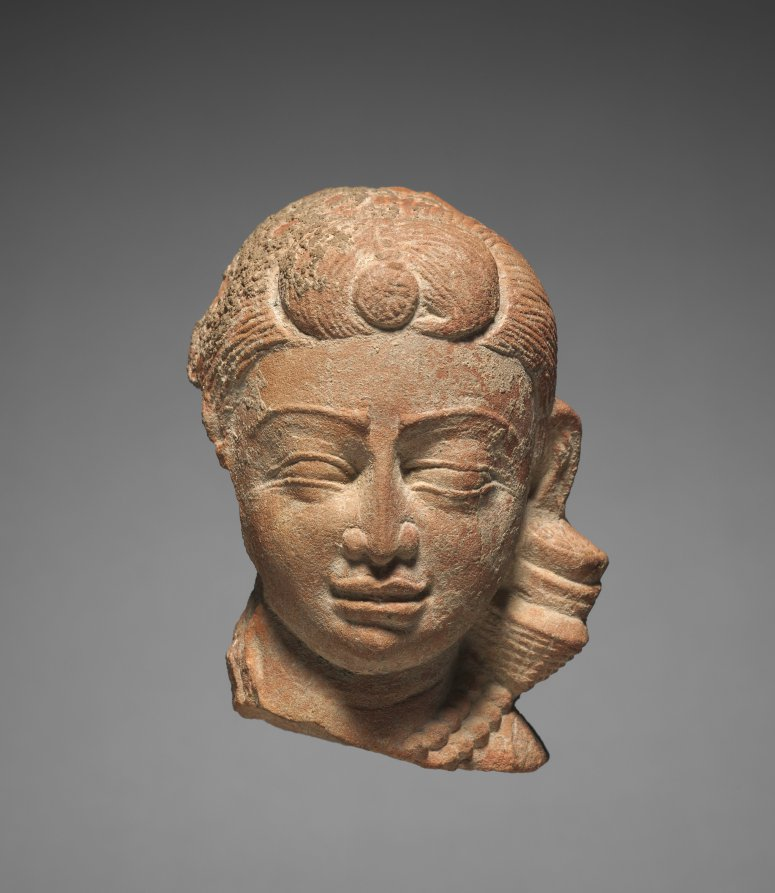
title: Miniature Female Head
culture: India, Mathura, Kushan period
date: 100s CE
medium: sandstone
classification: Sculpture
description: Against the backdrop of the large-scale monumental sculpture for which the Mathura school is justly noted, this miniature head may appear insignificant; however, it exemplifies on a diminutive scale qualities of style and execution that not only parallel developments noticeable on monumental sculpture but also reflect a certain freedom of treatment of facial details that clearly denotes that while the artist worked in a minor key, the creation was neither inconsequential nor a sequacious rendering of the major sculptural trends of large-scale sculptures from Mathura. This small female head is comparable to the yaksi in the CMA's 1965.250 in several readily apparent details of form and type. The dual strands of the large-beaded necklace, the oversized ear ornament, and the hairstyle with the lalatika in the circular, severely defined central section of the coiffure are reductive echoes of the larger sculpture that clearly suggest an analogous date for this head. While repeating some of the features of the yaksi, this small head retains an individuality and distinctness by means of fine details such as the indented secondary line defining the upper lip of the slightly parted mouth and the chiseled clarity of the nose and brows of this sloe-eyed image. The fullness of the facial planes and the sensuous curves of the full, lower lip, while accentuating by contrast the almost metallic quality of the eye and nose, also quite compellingly link this head with the larger yaksis.